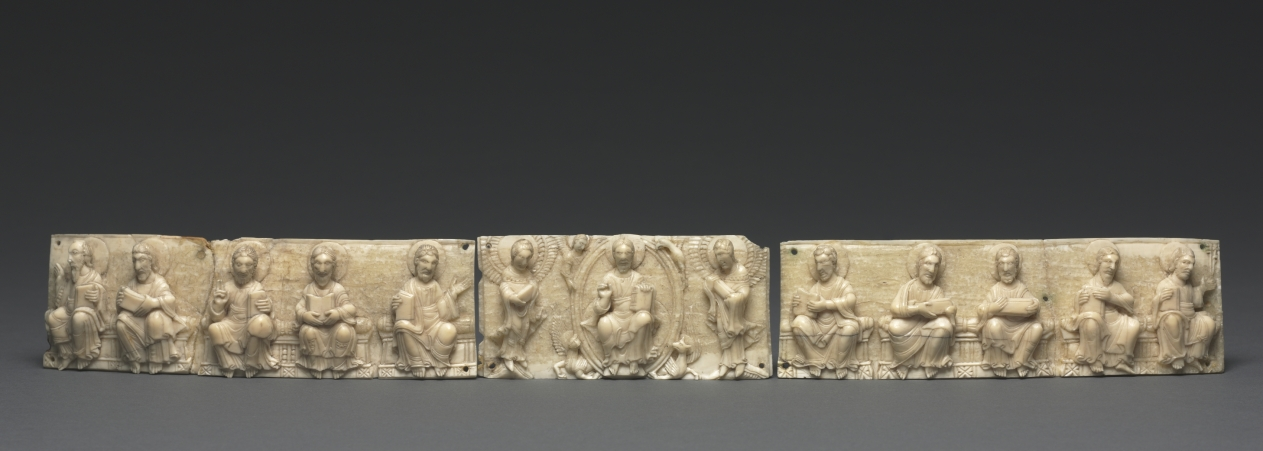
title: Plaque from a Portable Altar: Christ and the Apostles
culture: Germany, Lower Rhine Valley, Romanesque period, 11th century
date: 1050–1100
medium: walrus ivory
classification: Ivory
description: These intricately carved ivory panels once decorated the sides of a portable altar. Three of the plaques, those depicting Christ in Majesty and his apostles, were the first major acquisition of William M. Milliken, the museum's first curator of decorative arts and later director (1930–1958). As Milliken later recalled, the pieces "were immensely intriguing, monumental in scale, even if tiny in size, the Christ in the mandorla could have been enlarged and would have graced the tympanum of a great cathedral."